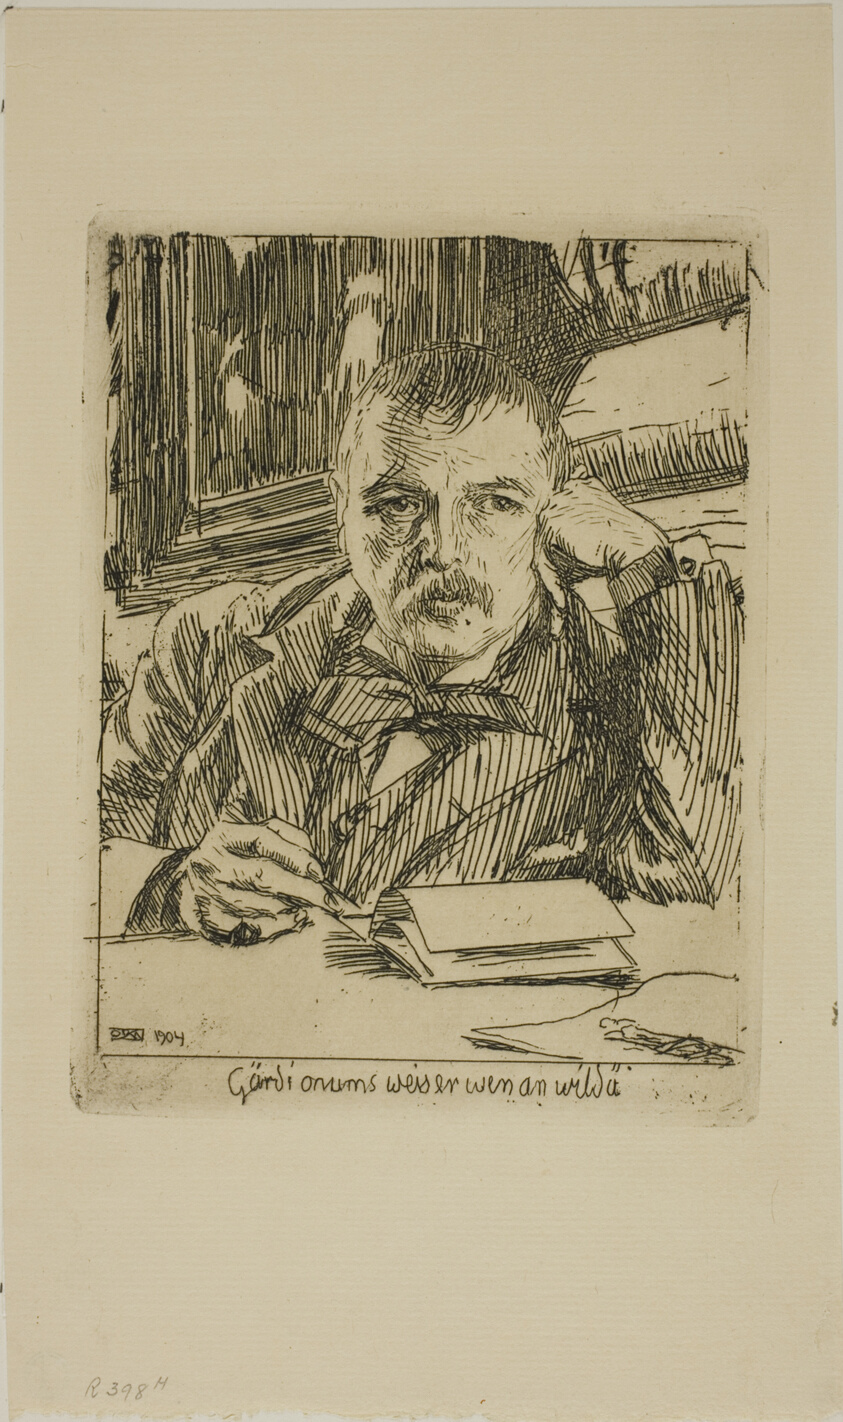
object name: Print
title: Self-Portrait with Inscription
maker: Anders Zorn (Swedish, 1860-1920)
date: 1904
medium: Etching on cream laid paper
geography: Sweden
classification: etching; print; prints and drawing